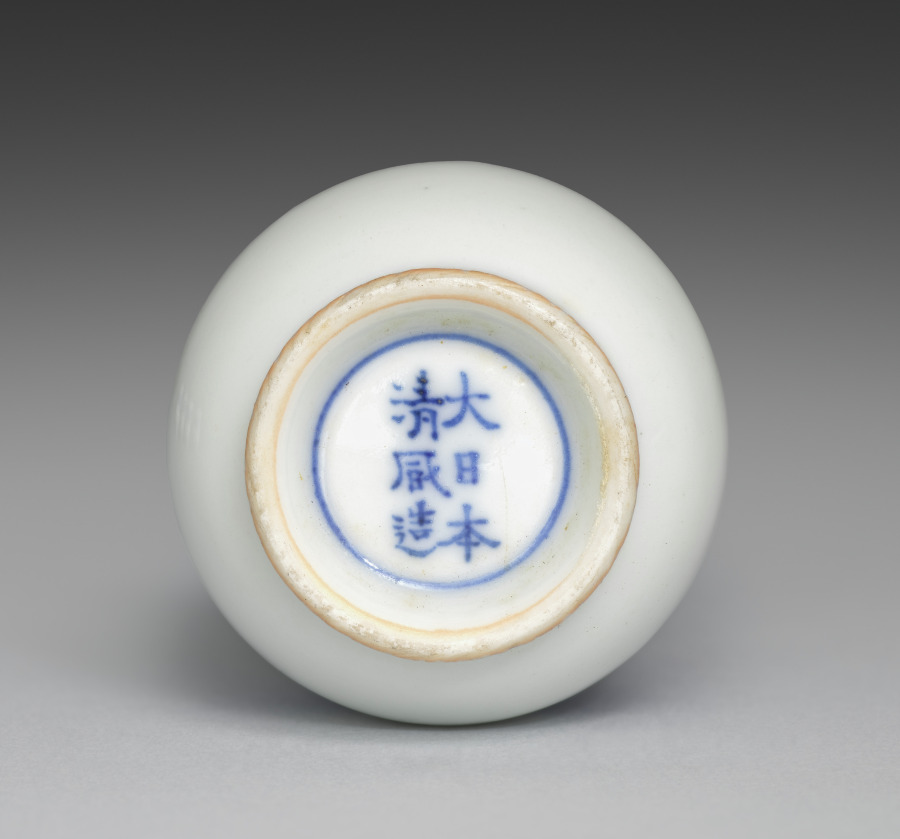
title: Cup from Sake Cups with Dragons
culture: Japan, Meiji period (1868–1912)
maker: Seifū Yohei III (Japanese, 1851–1914)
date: c. 1893–1914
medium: One from a set of six sake cups; porcelain with underglaze blue and iron oxide rims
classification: Ceramic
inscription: 大日本清風造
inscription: 清風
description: Each of these sake cups pictures two backward-looking dragons. The highly stylized creatures resemble jade carvings.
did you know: Seifū Yohei III was inspired by the Chinese mythical animals that were common on porcelain objects made at Jingdezhen in China during the Ming dynasty (1368–1644) and then exported around the world.